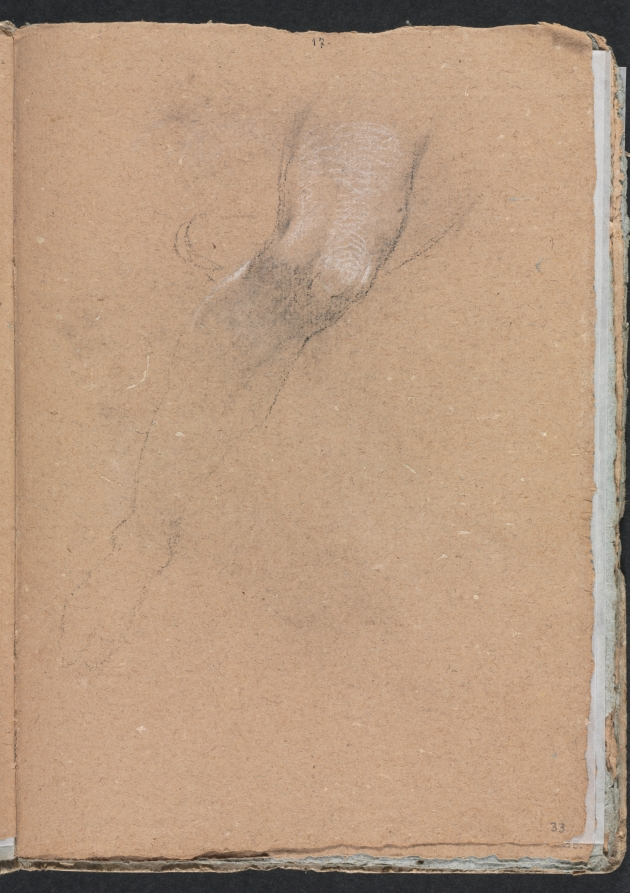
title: Verona Sketchbook: Right leg (page 33)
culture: Italy, 18th century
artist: Francesco Lorenzi (Italian, 1723–1787)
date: 1760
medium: black chalk with white heightening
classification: Bound Volume